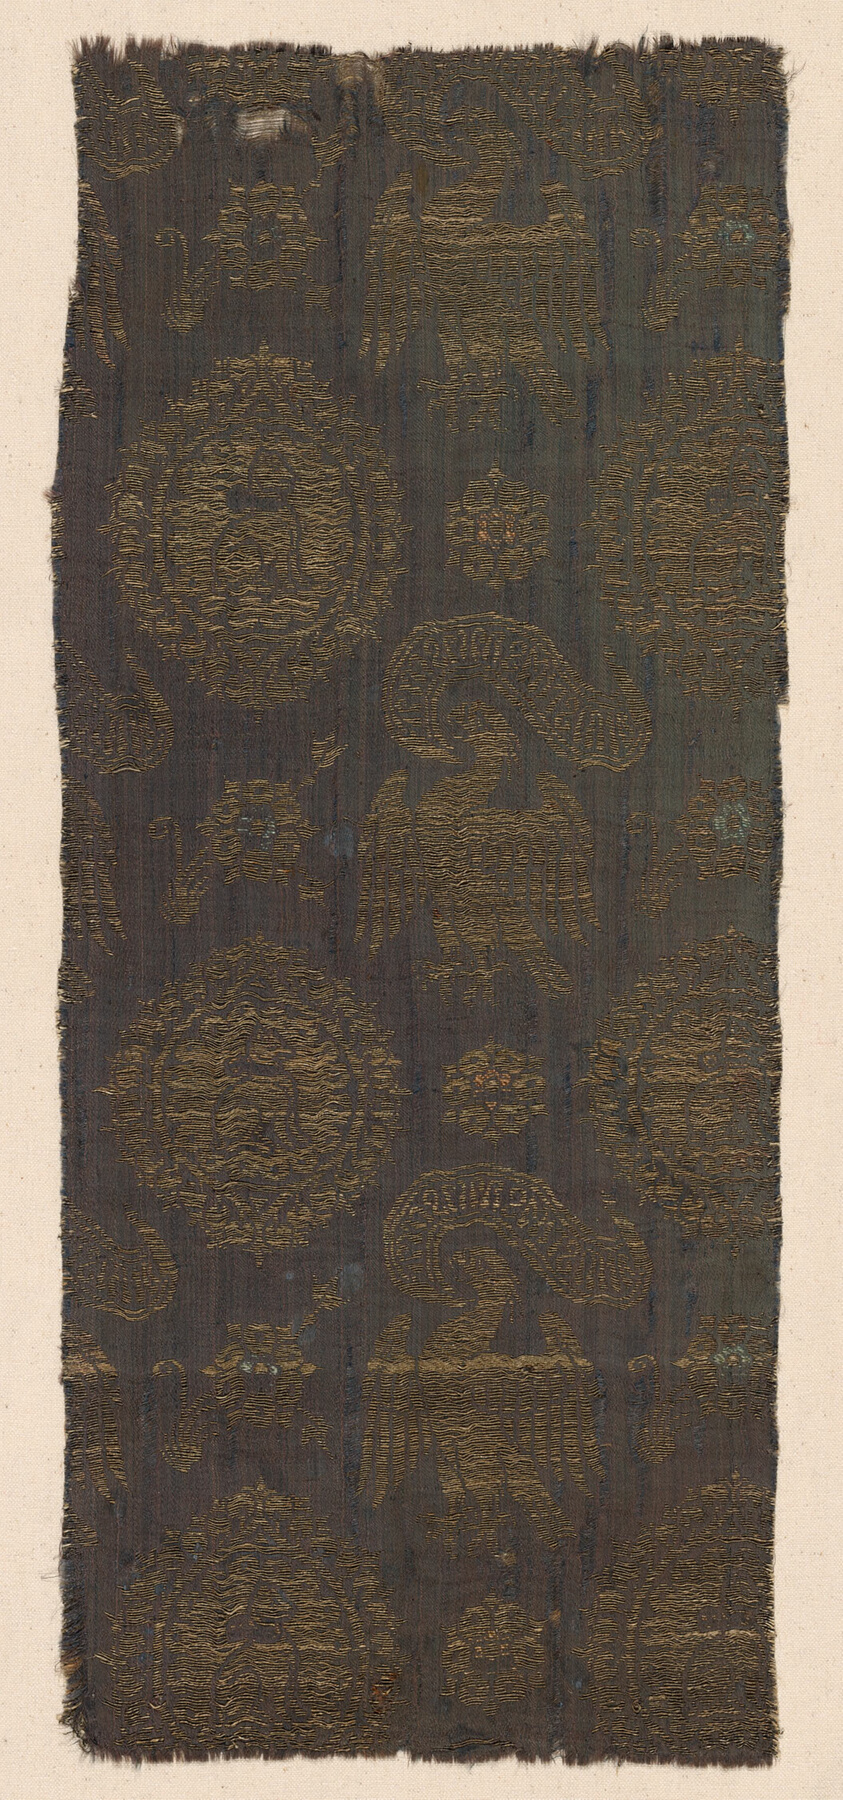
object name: Textile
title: Fragment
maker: Italy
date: Late 14th/15th century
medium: Silk, gilt-animal-substrate-wrapped linen, warp-float faced 4:1 satin weave with supplementary patterning wefts bound by secondary binding warps in twill interlacings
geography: Italy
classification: textile; weaving